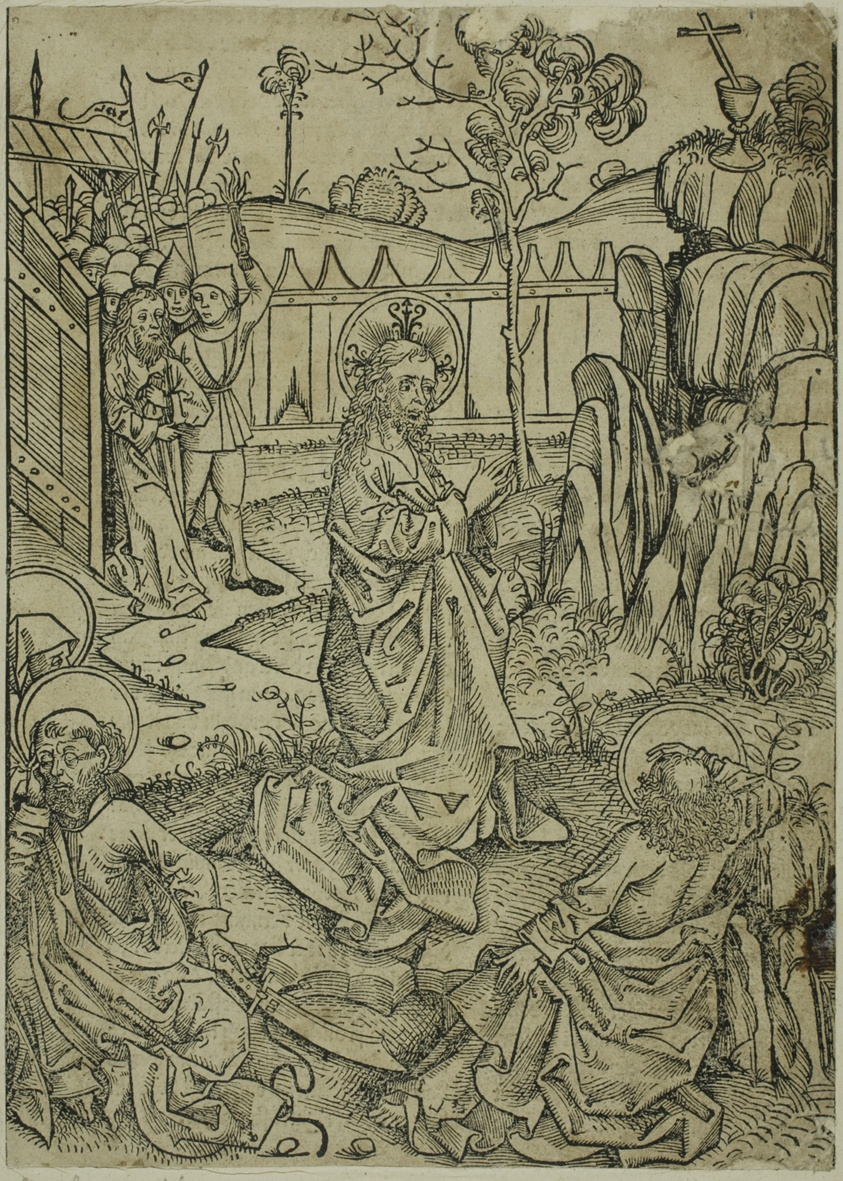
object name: Print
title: Christ on Mount of Olives, page 52 from the Treasury (Schatzbehalter)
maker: Michael Wolgemut and Workshop (German, 1434/37–1519); published by Anton Koberger (German, 1440–1513)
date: 1491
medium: Woodcut on cream laid paper with letterpress on verso, laid down on ivory wove album sheet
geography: Germany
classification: woodcut; print; prints and drawing